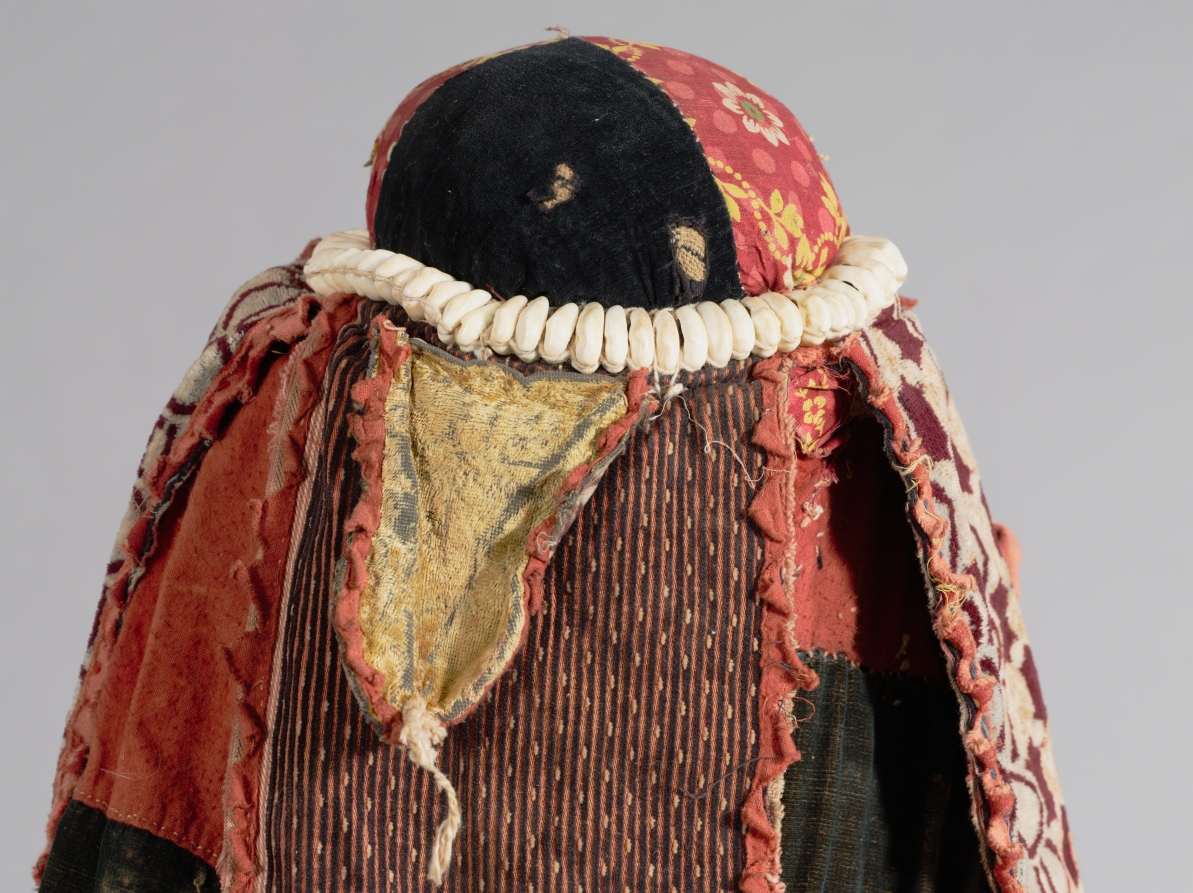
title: Egúngún Masquerade Dance Costume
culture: Africa, West Africa, Nigeria, Yorùbá-style maker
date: 1900s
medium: cotton, velvet, flannel, leather, dye, probably wood, cowrie shells, metal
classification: Mask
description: Swirling into motion, egúngún masquerade costumes appear during annual festivities to bless the community. Manifesting ancestral spirits, they serve as a bridge between the living and the otherworld. The fabric panels create a dwelling place for ancestral spirits. Arranged and selected according to Yorùbá design sense (ojú-ọnà), this mask incorporates hundreds of African, Asian, and European fabrics. These include imported damasks, velvets, faux furs, and embroideries, as well as local indigo-dyed cottons.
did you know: This masquerade costume is made from both imported and locally made fabrics.